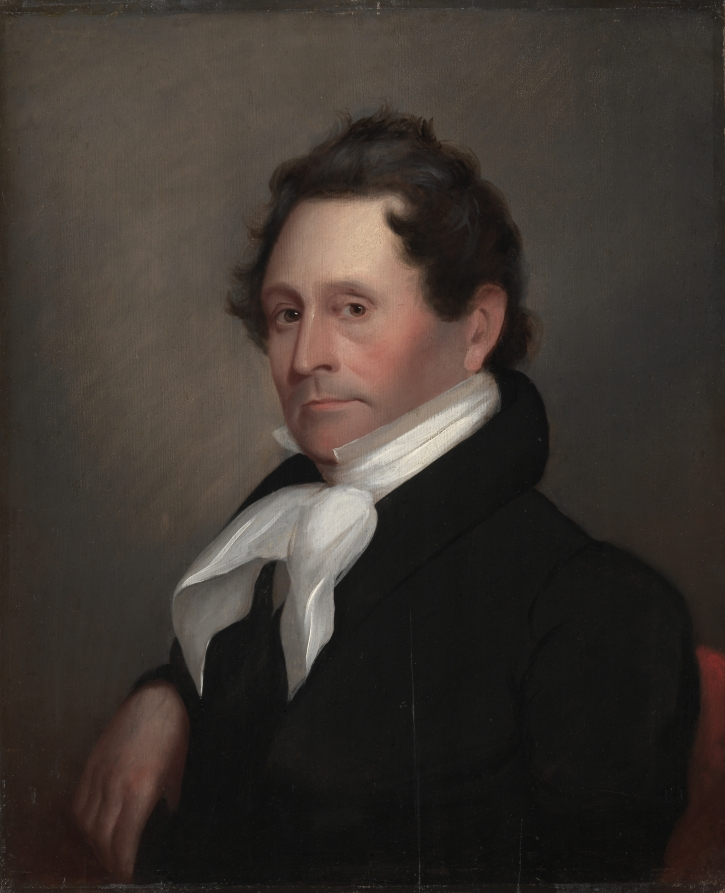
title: Senator Thomas Hart Benton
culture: America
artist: Matthew Harris Jouett (American, 1787/88–1827)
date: 1820s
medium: oil on wood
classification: Painting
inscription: Annotated on back: "Col Thomas Hart Benton"